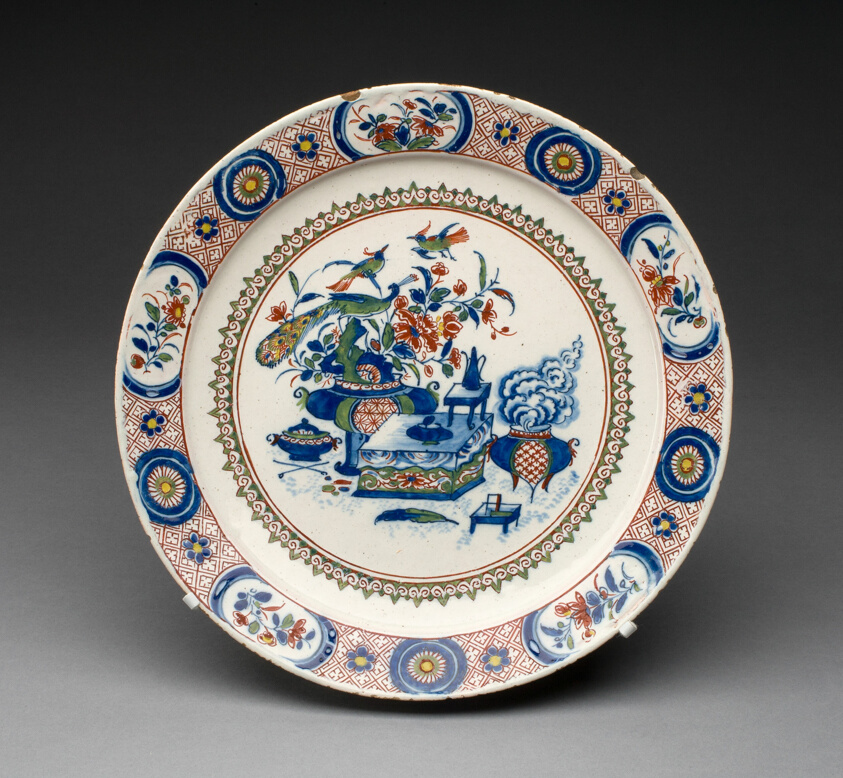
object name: Ceramics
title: Plate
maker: Delft, Netherlands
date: c. 1720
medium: Tin-glazed earthenware with polychrome enamels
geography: Delft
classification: plate (general, dish); dish (vessel); earthenware; ceramics; european decorative arts